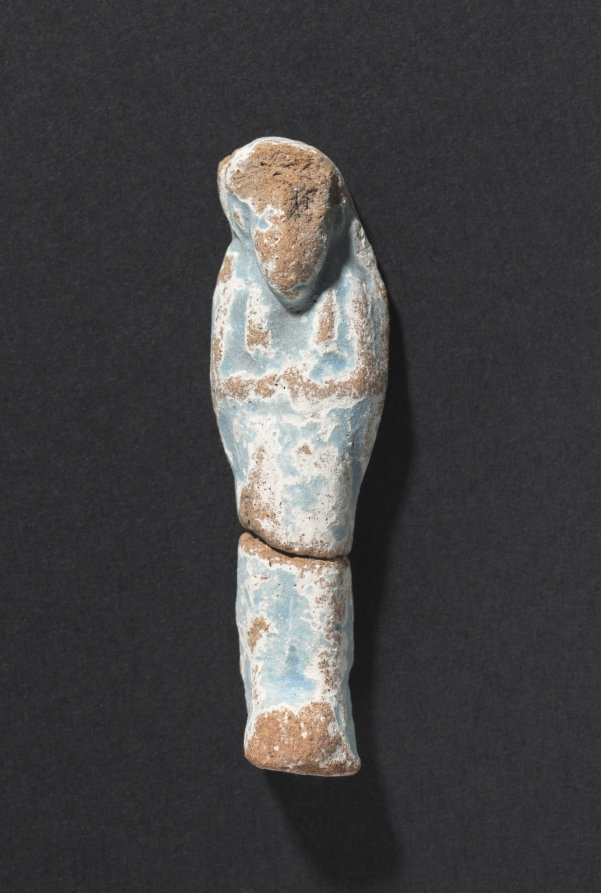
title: Shawabty of Ditamenpaankh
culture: Egypt, Late period (715–332 BCE), Dynasty 25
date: 715–656 BCE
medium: terracotta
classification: Funerary Equipment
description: High demand for shawabtys in the Late Period, a time when as many as 400 or more shawabtys were placed in the tomb with the deceased, gave rise to a specialized container for storing them: the shawabty box. This example is inscribed for the lady of the house, Ditamenpaankh, and was probably one of a pair originally made for her. The single-masted boat on the box's lid is perhaps an allusion to the pilgrimage of the deceased to the holy city of Abydos, the cult city of Osiris, king of the dead. The shawabtys inside are crude, mass-produced examples cast in an open mold. Made of terracotta, their blue paint imitates more costly shawabtys made of faience. As for the shawabty spell, it has been removed from its traditional location on the shawabty's front and relocated onto the sides of box, where it needed only to be written once, thus expediting production.